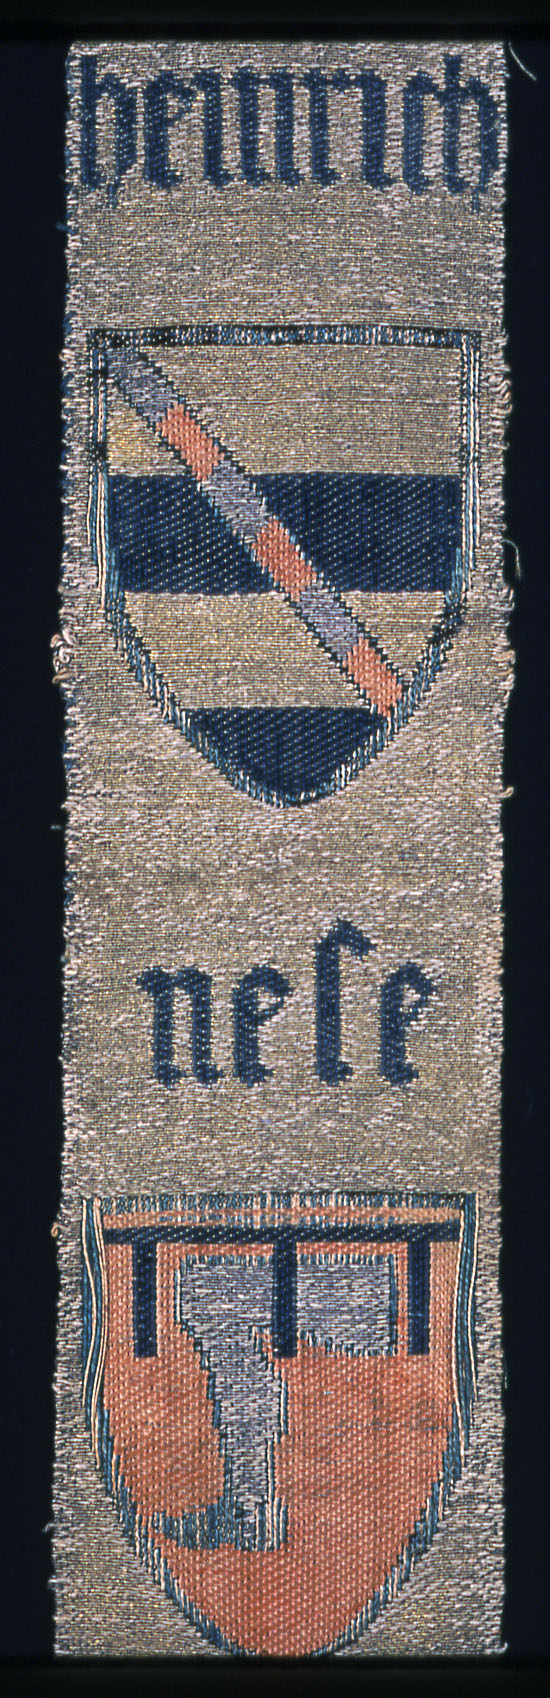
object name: Textile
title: Portion of an Orphrey Band with Coat-of-Arms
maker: Germany, Cologne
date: 15th century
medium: Linen, silk and gilt-animal-substrate-wrapped linen, bands of weft-float faced 1:2 twill weave with inner warps and bands of weft-float faced 1:2 complementary twill weave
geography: Cologne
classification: textile; weaving; liturgical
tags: coat of arms, royalty